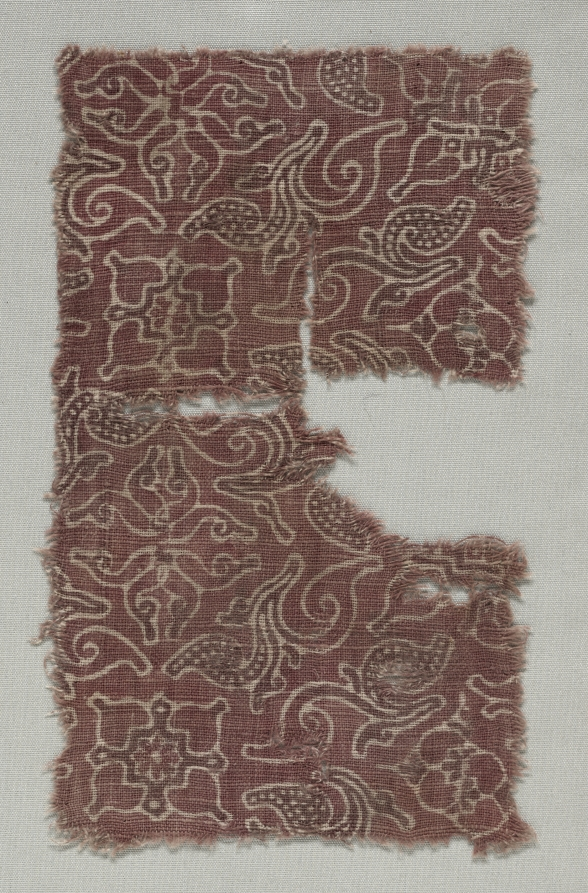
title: Fragment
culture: India, 15th century (?)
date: 1400s (?)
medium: stamped resist, painted mordants, dyed; cotton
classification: Textile